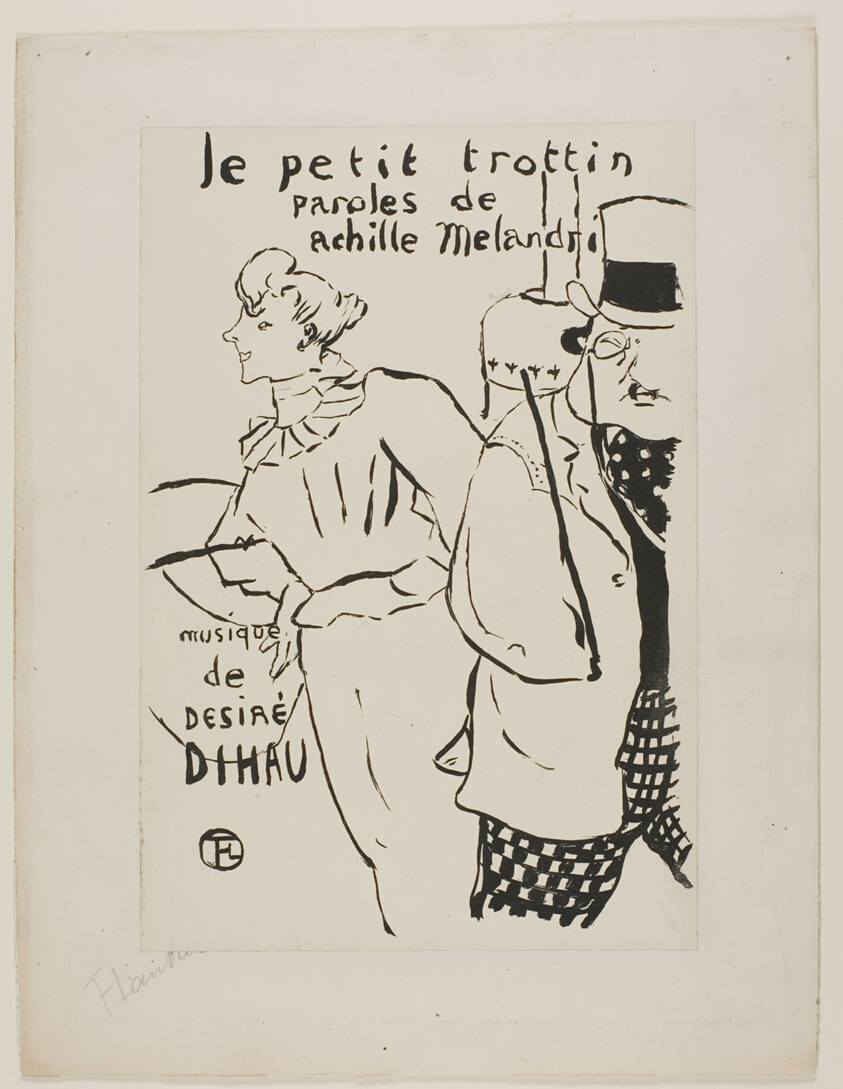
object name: Print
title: The Little Errand Girl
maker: Henri de Toulouse-Lautrec (French, 1864-1901)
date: 1893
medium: Lithograph on cream wove paper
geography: France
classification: lithograph; print; prints and drawing